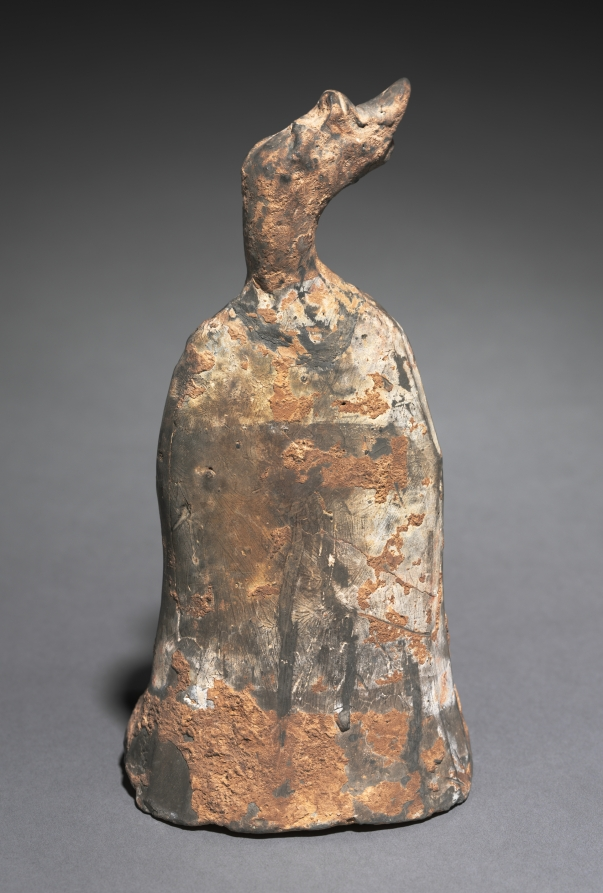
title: Mortuary Figure of the Zodiac Sign: Dragon (Leo)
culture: China, Northern Wei dynasty (386-534)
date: 500s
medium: gray earthenware with traces of slip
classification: Sculpture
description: The twelve-animal zodiac series—rat, ox, tiger, rabbit, dragon, snake, horse, goat, monkey, rooster, dog, and boar—signifies a traditional Chinese concept of time structured in a cyclical order. The twelve animals are also linked to the art of fortune-telling that underlies human existence in connection with the changes of the universe. The use of the twelve zodiac animals as tomb furniture suggests they provided a cosmological structure for the afterlife.